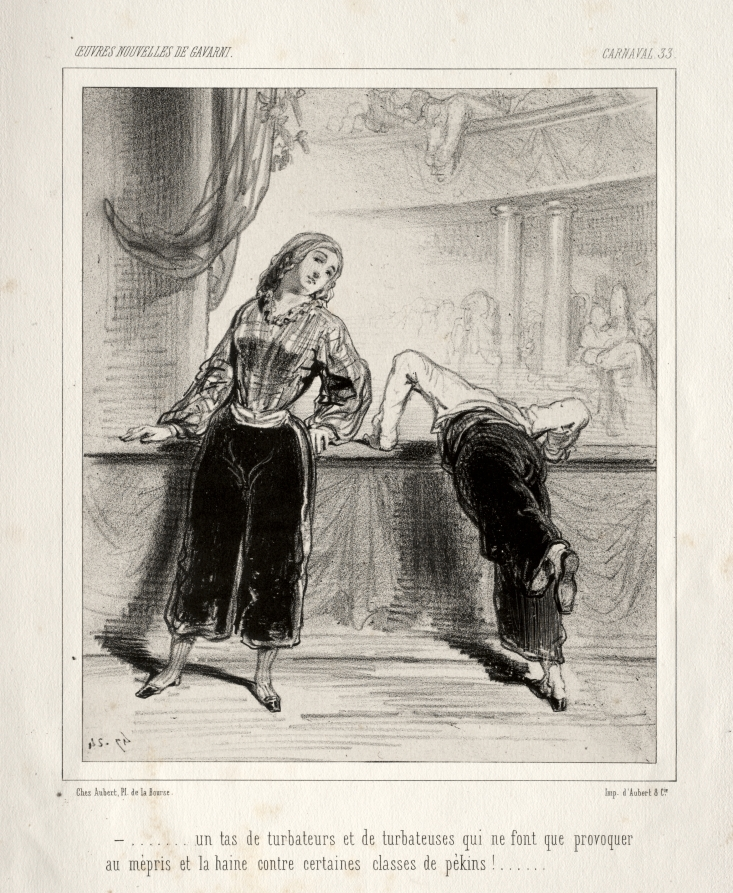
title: Carnaval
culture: France, 19th century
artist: Paul Gavarni (French, 1804–1866)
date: c. 1841–47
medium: lithograph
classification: Print